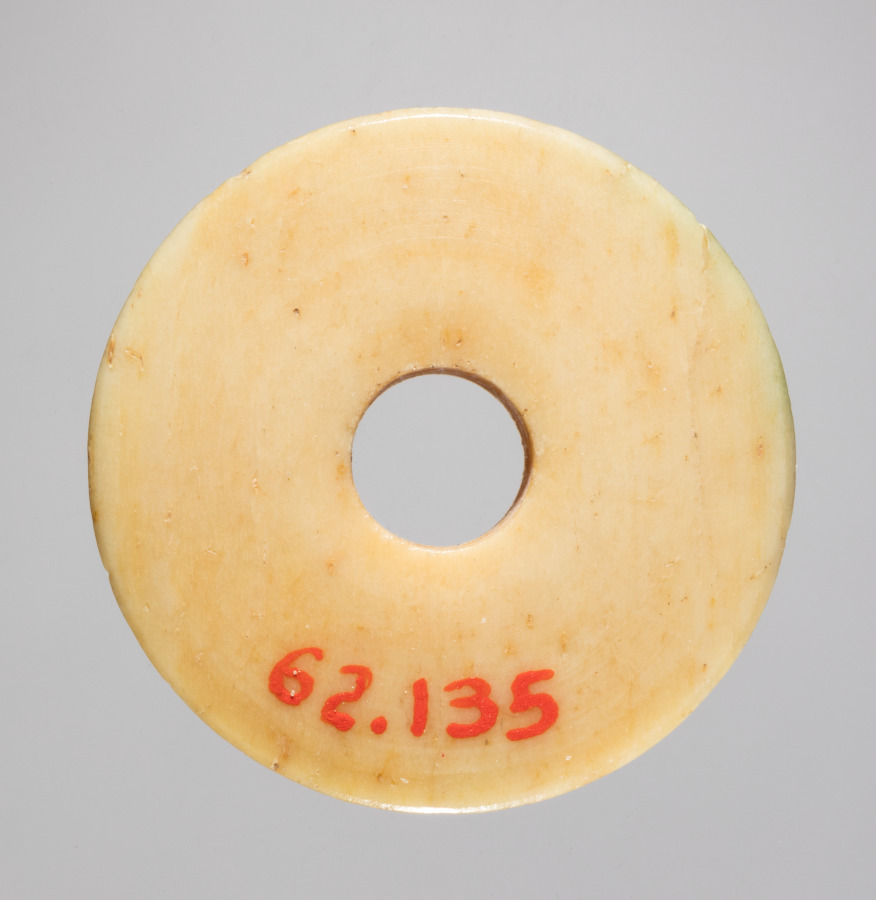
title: Spindle Whorl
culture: Iran, early Islamic period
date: 700s - 900s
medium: bone, incised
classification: Spindle Whorl